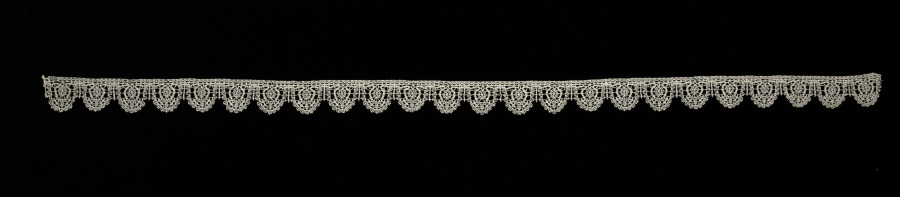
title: Lace Edging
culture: Italy, Genoa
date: 1600s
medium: Bobbin lace (Rose Lace)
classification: Lace